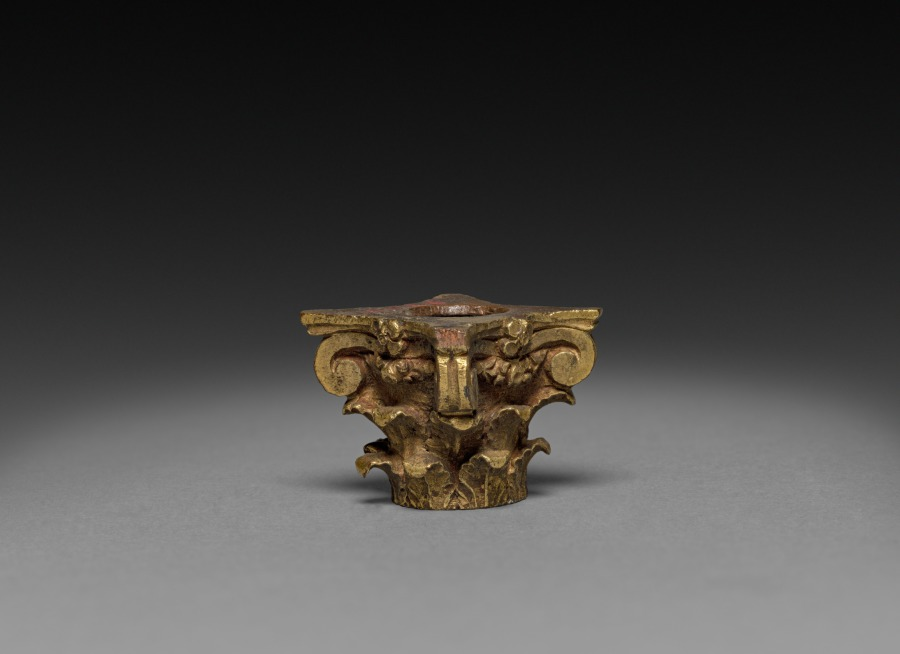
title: Ornamental Capital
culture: France, late 18th century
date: 1775–1799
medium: gilt bronze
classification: Metalwork